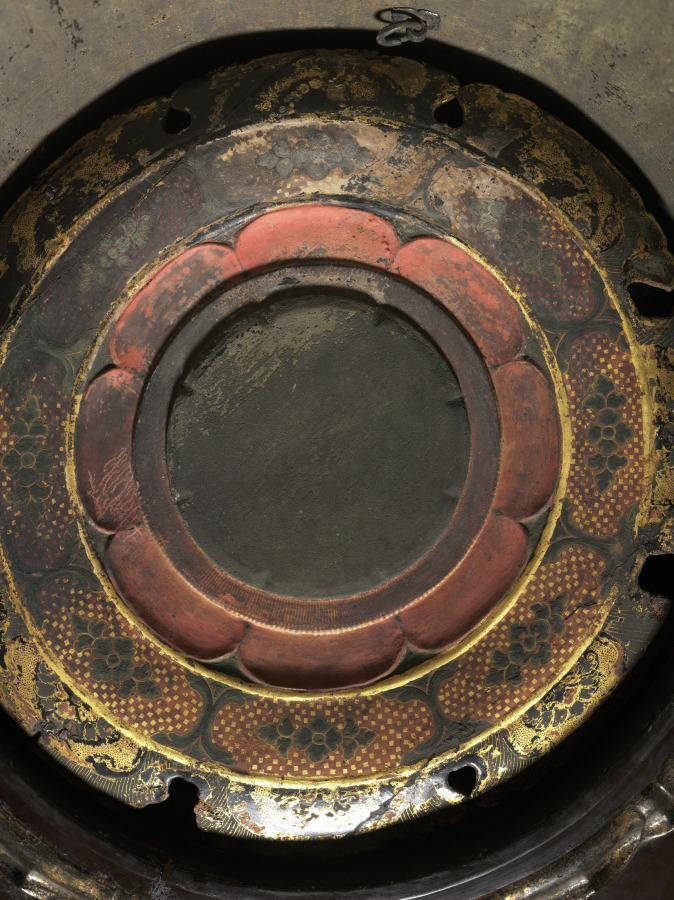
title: Repository for the Great Perfection of Wisdom Sutra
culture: Japan, Heian period (794–1185)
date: late 1100s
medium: lacquered wood with ink, color, gold, cut gold, and metalwork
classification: Lacquer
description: This repository is one of a pair that once contained the scrolls of a religious text called the Great Perfection of Wisdom Sutra. Two discs painted on the back have the sacred syllables representing the Buddha Shakyamuni and the Buddha Amida. Eight of the 16 benevolent but fierce looking deities who protect the text appear on the doors.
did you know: The mate to this object is in the Nara National Museum in Japan.